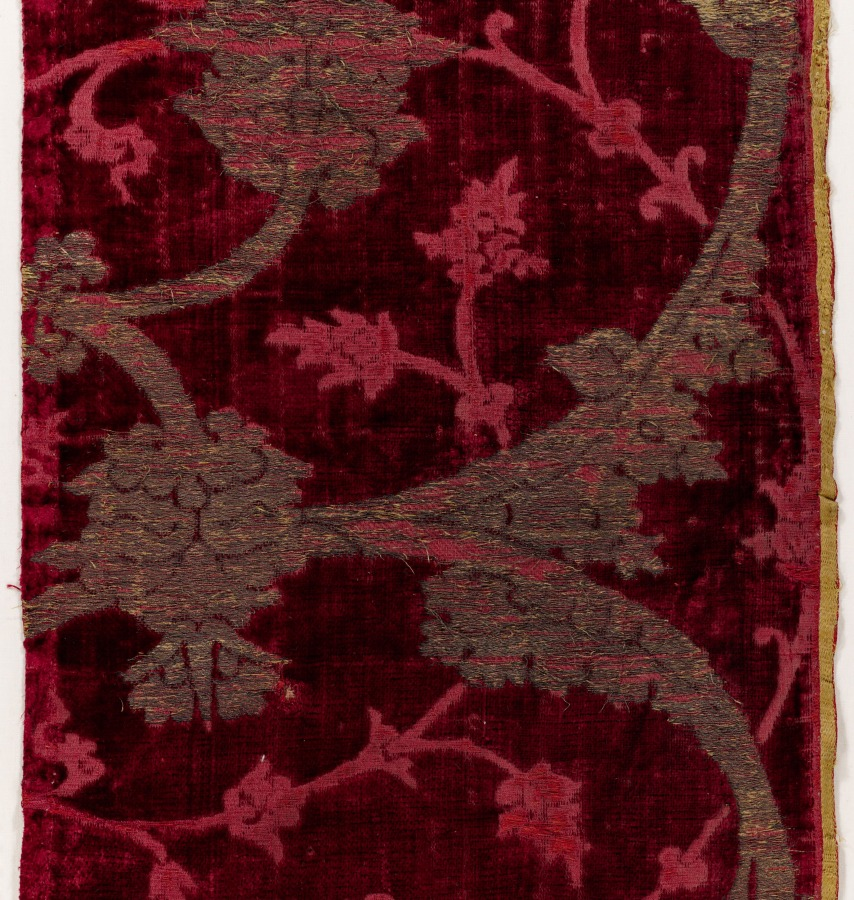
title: Velvet Fragment (of a Chasuble ?)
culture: Italy, 15th century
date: 1400s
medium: velvet (cut, voided, and brocaded): silk and gold thread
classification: Velvet